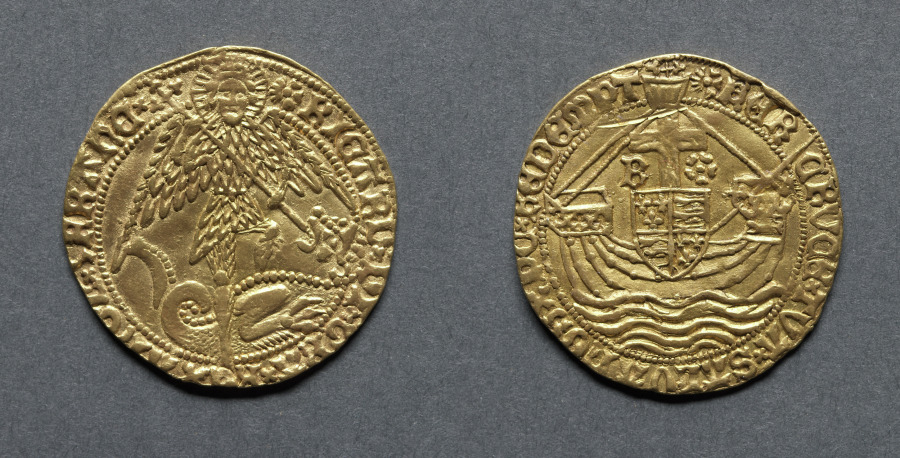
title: Angel: St. George Slaying the Dragon (obverse); Ship with Shield of Arms and Cross (reverse)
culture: England, Richard III, 1483-1485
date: 1483–85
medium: gold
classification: Coins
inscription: RICARD DIGRA REX ANGL Z FRANC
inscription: PER CRVCE TVA SALVA NOS XPC REDEMPT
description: This coin is similar to the angel of Henry VI, 1969.167, but from completely different dies. Between the second reign of Edward IV and the reign of Richard III, Edward V, at the age of 13, reigned briefly from April 9 to June 22, 1483. Richard, Edward's uncle, caused the boy to be imprisoned in the Tower where he and his younger brother were murdered at the instigation of Richard. Their bodies were buried under a staircase and lay undiscovered for 200 years. Richard, who had been Protector during the reign of Edward V, was crowned king. The initial mark, half-rose and sun, once thought to indicate the coins of Edward V, was been assigned to those of Edward IV. The only coins of Edward V which can definitely be attributed to his reign are those with the mink mark boar's head that was also the mark of Richard III. Only five examples of gold angels of Edward V exist.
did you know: The reverse side shows an English galley, the monogram R, and a rose representing the House of York.